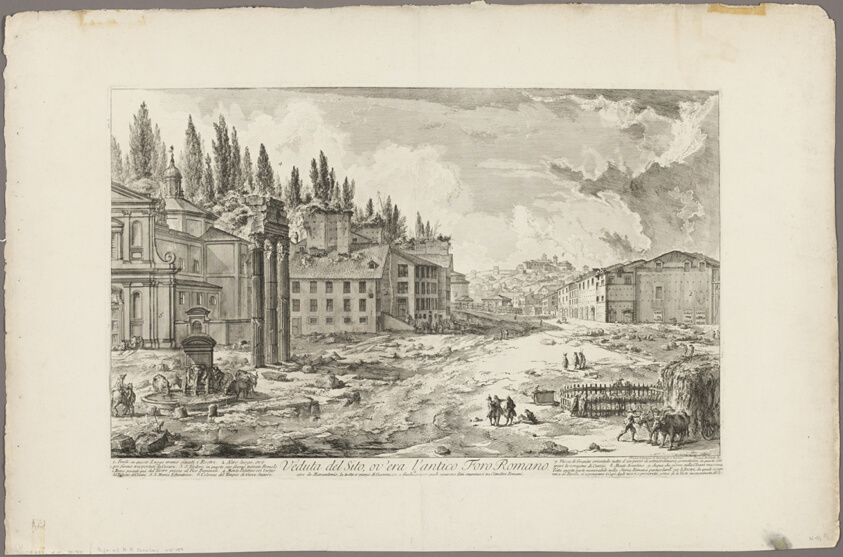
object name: Print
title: View of the Site of the ancient Roman Forum, from Views of Rome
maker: Giovanni Battista Piranesi (Italian, 1720-1778)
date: 1750/59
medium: Etching on heavy ivory laid paper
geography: Italy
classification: etching; print; prints and drawing